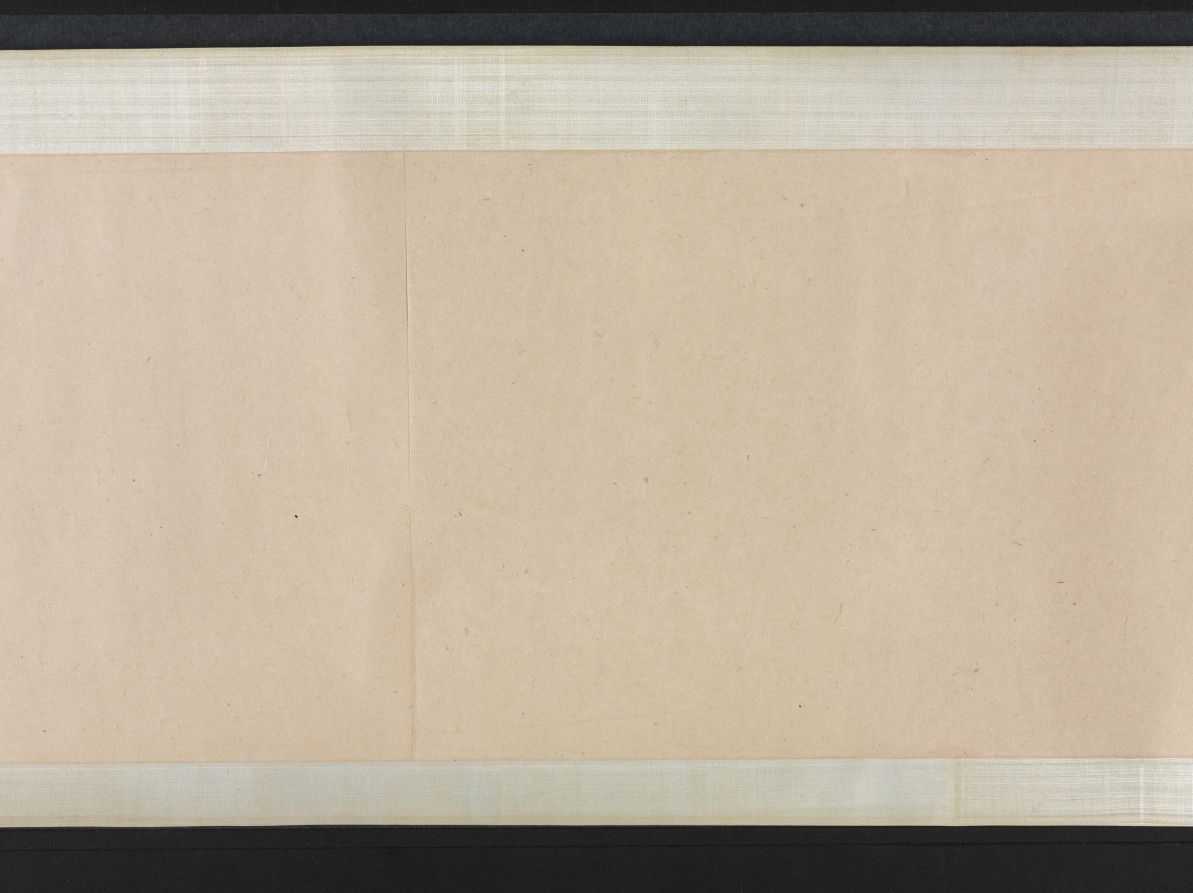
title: Saying Farewell at Xunyang (Song of the Pipa)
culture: China, Ming dynasty (1368–1644)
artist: Wen Boren (Chinese, 1502–1575)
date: 1500s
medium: handscroll, ink and color on paper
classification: Painting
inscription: "潯陽送客圖" 五峰山人文伯仁寫于停雲館中 [印] 文伯仁; 五峰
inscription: 2 colophons and 9 additional seals: 1 transcription of "Pipa xing 琵琶行” (Song of Pipa) and 3 seals of Zhu Yizun 朱彜尊 (1629-1709); 2 seals of Wu Rongguang 吳榮光 (1773-1843); 1 colophon, dated 1826, and 3 seals of Wu Xijia 吳錫嘉 (mid-1700s)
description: This handscroll depicts The Song of the Pipa, a poem by Bai Juyi 白居易 (772–846) written after the poet’s encounter with a pipa player on the Yangzi River. Expelled from her home city when her beauty and fame had faded, she played for the poet at night. Her musical performance and tragic life story resonated with Bai Juyi, who had just been demoted and exiled from life at court himself. The hazy, vast view and pale color tonalities of this painting illustrate these feelings of endless sadness, having lost one’s sense of purpose in life.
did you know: Wen Boren depicted the chilly autumn water with a fishnet pattern.